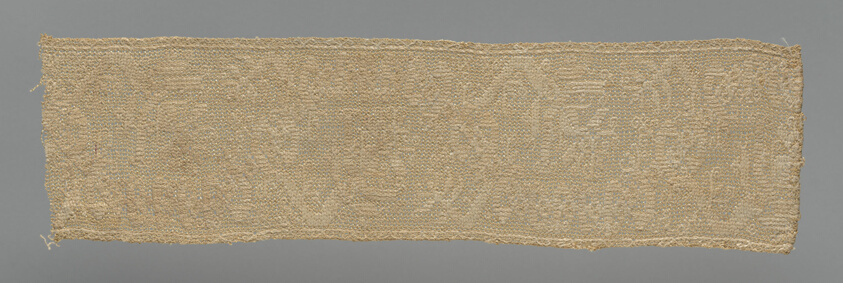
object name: Textile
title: Strips (17)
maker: Italy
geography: Italy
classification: textile; lace